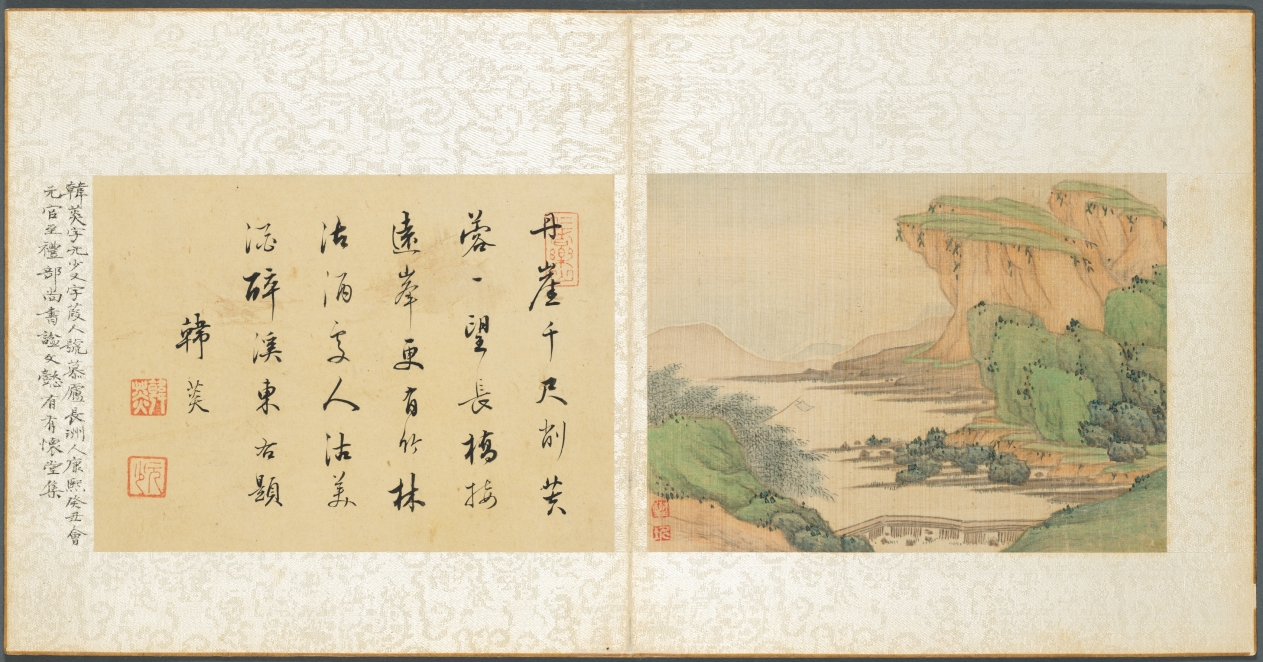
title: Album of Miscellaneous Subjects, Leaf 2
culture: China, Qing dynasty (1644-1911)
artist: Fan Qi (Chinese, 1616–after 1694)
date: early 1650s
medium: album leaf, ink and color on silk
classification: Painting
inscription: Artist seal: Fan Qi 樊圻. Poem by Han Tan 韓菼 (1637–1704): A thousand feet of red cliffs look like a sculptured flower of Fu-yung;/ In one glance, the long bridge joins adjacent ridges./ Furthermore a wine shop stands in a bamboo grove;/ The fellow who bought some good wine is drunk on the eastern shore of the stream.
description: Fan Qi's painting on this second leaf of the album is, perhaps, based on Du Mu's poetic line: The herdboy pointed to the distant Apricot Village. Han Tan's calligraphic colophon facing the painting reads: A thousand feet of red cliffs look like a sculptured flower of furong; In one glance, the long bridge joins adjacent ridges. Furthermore a wine shop stands in a bamboo grove; The fellow who bought some good wine is drunk on the eastern shore of the stream.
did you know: A wine shop's flag is visible above the bamboo grove.